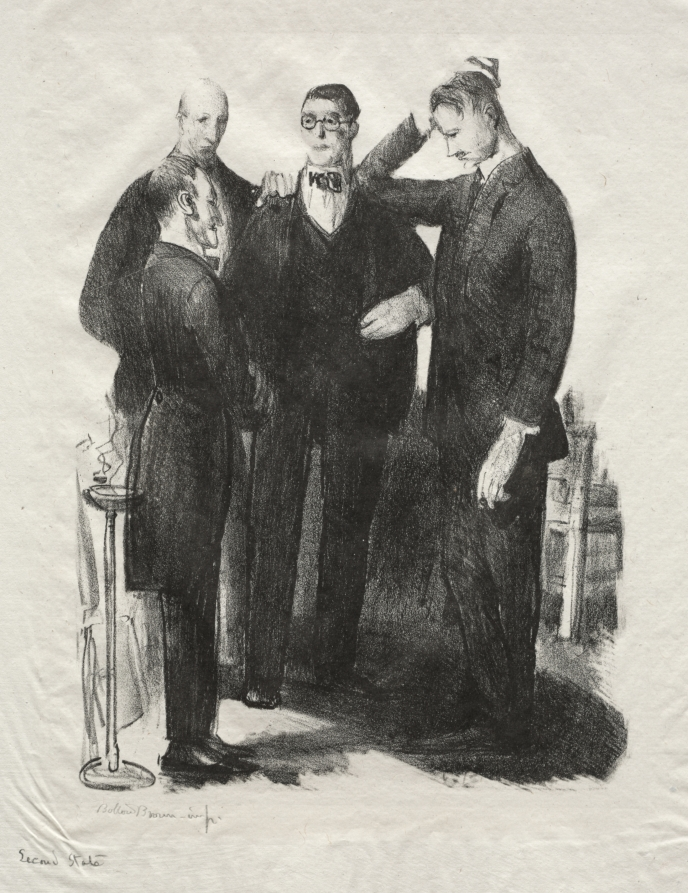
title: Four Friends, first state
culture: America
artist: George Bellows (American, 1882–1925)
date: 1921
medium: lithograph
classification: Print